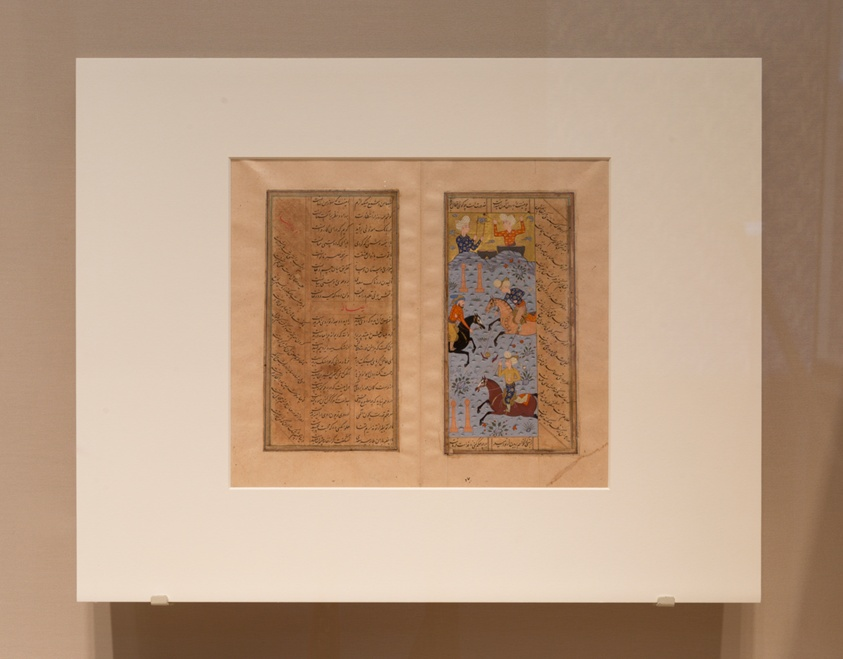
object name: Drawing and Watercolor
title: A Polo Game: Page from a Kulliyyat (Collected Works) of Sa'di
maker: Iran; Shiraz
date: Safavid dynasty (1501–1722), 16th century, c. 1585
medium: Ink, opaque watercolor, and gold on paper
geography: Shiraz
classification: miniature painting; painting; asian art